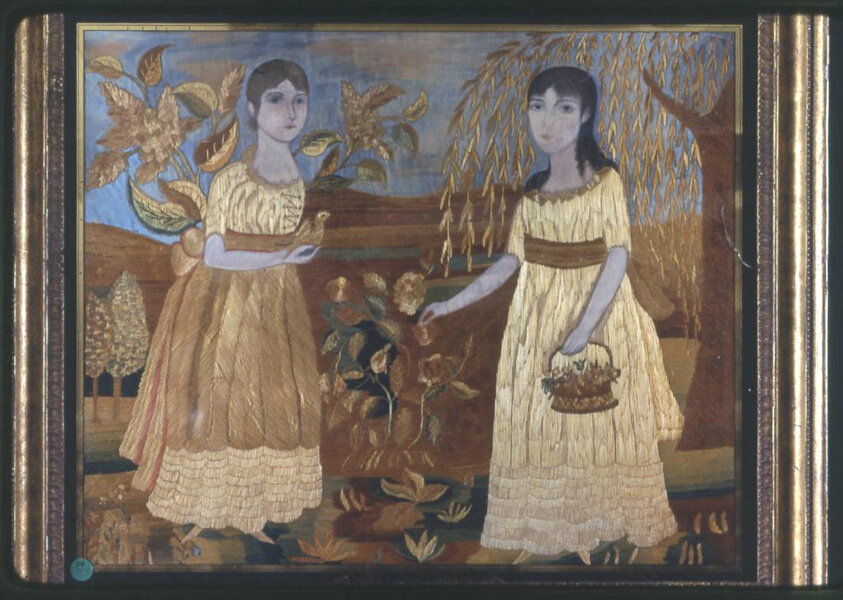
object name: Textile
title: Picture Depicting Ann and Sarah (Needlework)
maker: United States, probably New York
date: early 19th century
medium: Silk, plain weave; painted; embroidered with silk in satin and stem stitches; French knots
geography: New York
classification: textile; needlework (visual works)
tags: women, trees, flowers